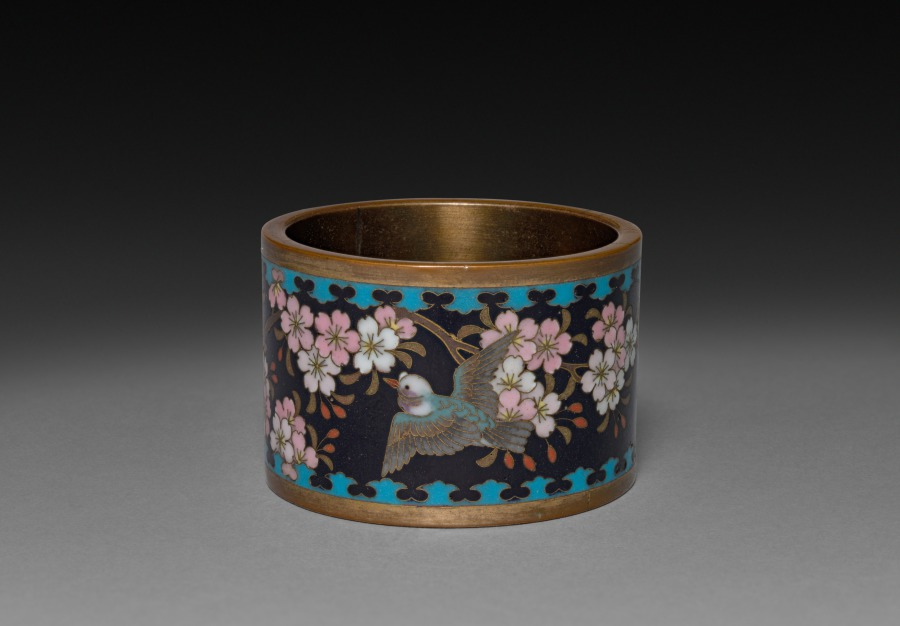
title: Napkin Ring with Cherry and Sparrow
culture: Japan, Meiji period (1868–1912) to Taishō period (1912–26)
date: early 1900s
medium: cloisonne enamel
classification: Enamel